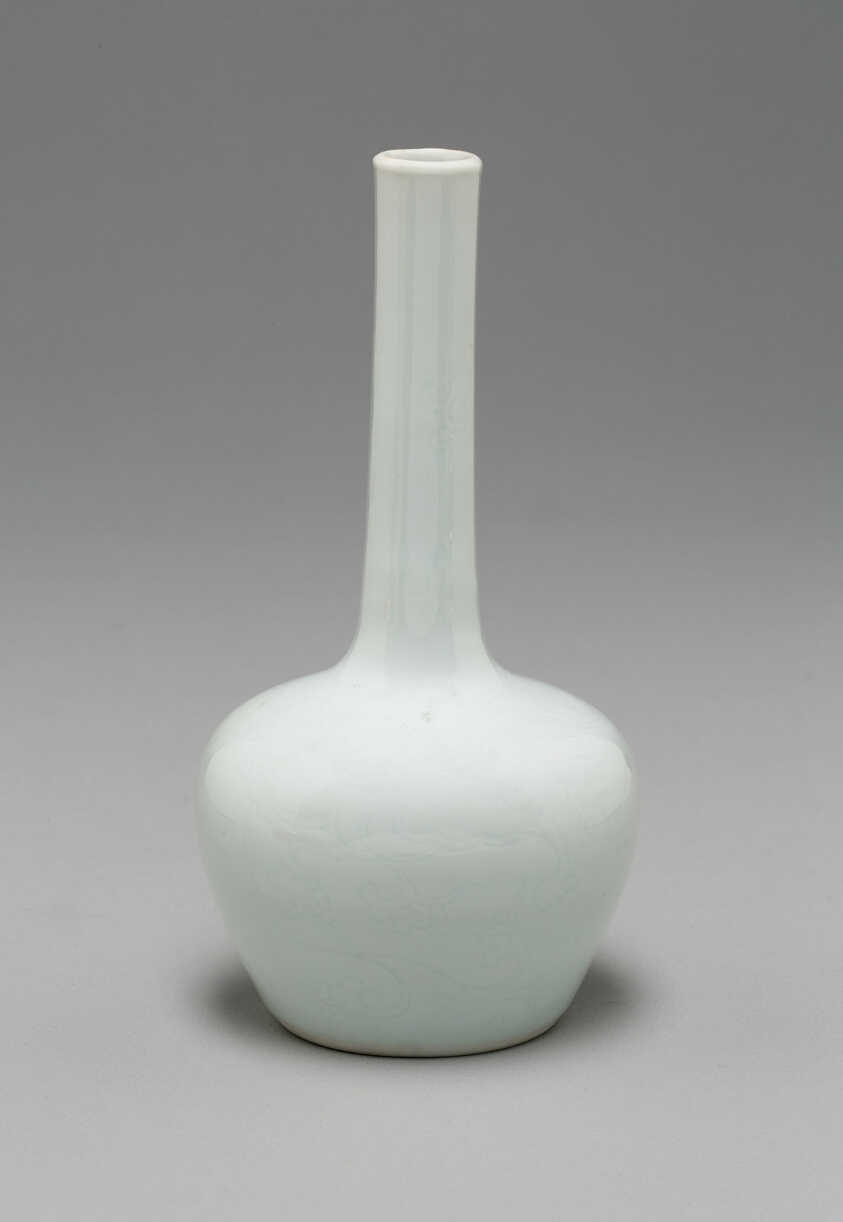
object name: Vessel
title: Bottle-Shaped Vase with Dragons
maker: China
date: Qing dynasty (1644–1911)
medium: Porcelain with underglaze incised decoration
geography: China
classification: porcelain; asian art; ceramics